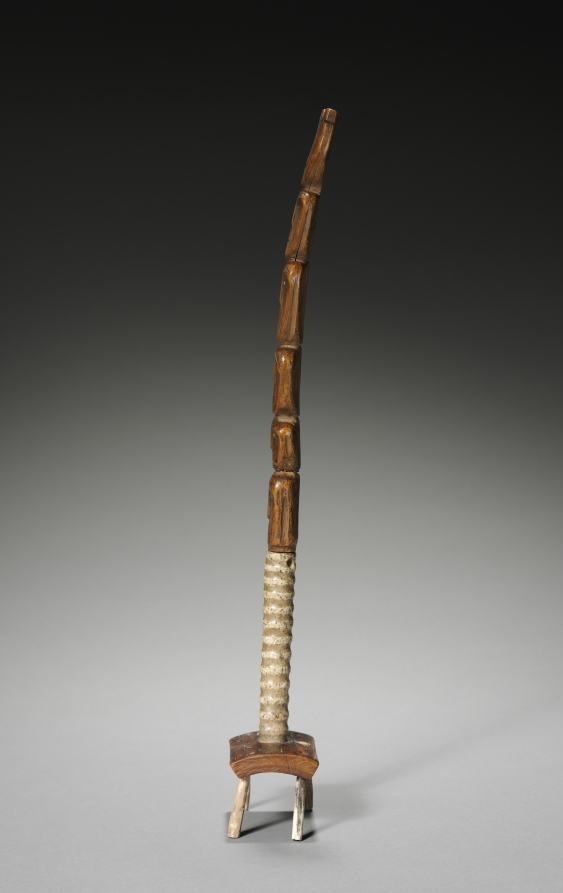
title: Totem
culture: America, North American Indian, Alaska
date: 20th century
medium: wood and bone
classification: Furniture and woodwork